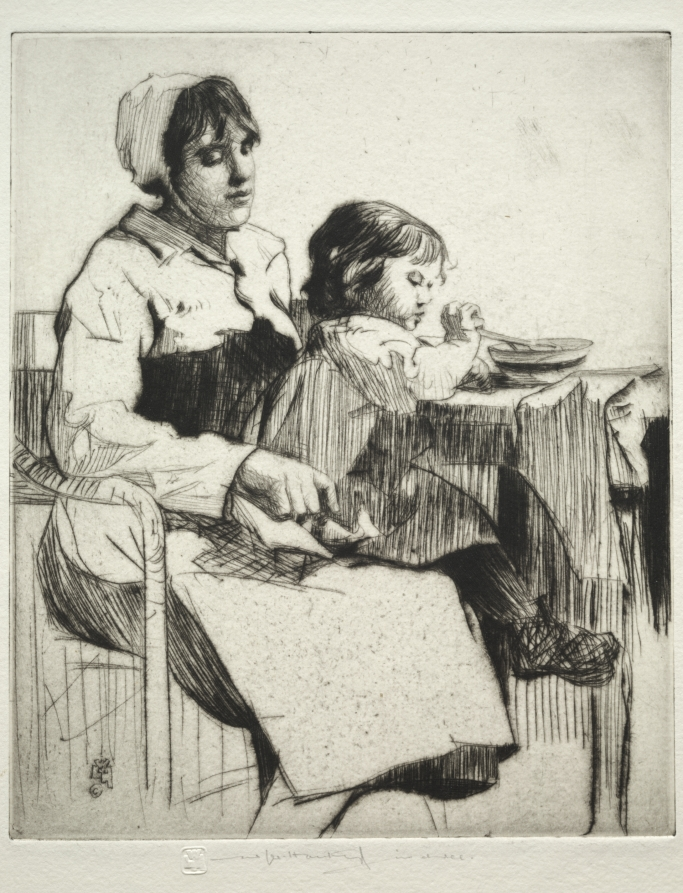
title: Le Repas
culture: England, 20th century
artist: William Lee Hankey (British, 1869–1952)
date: 1920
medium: drypoint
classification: Print